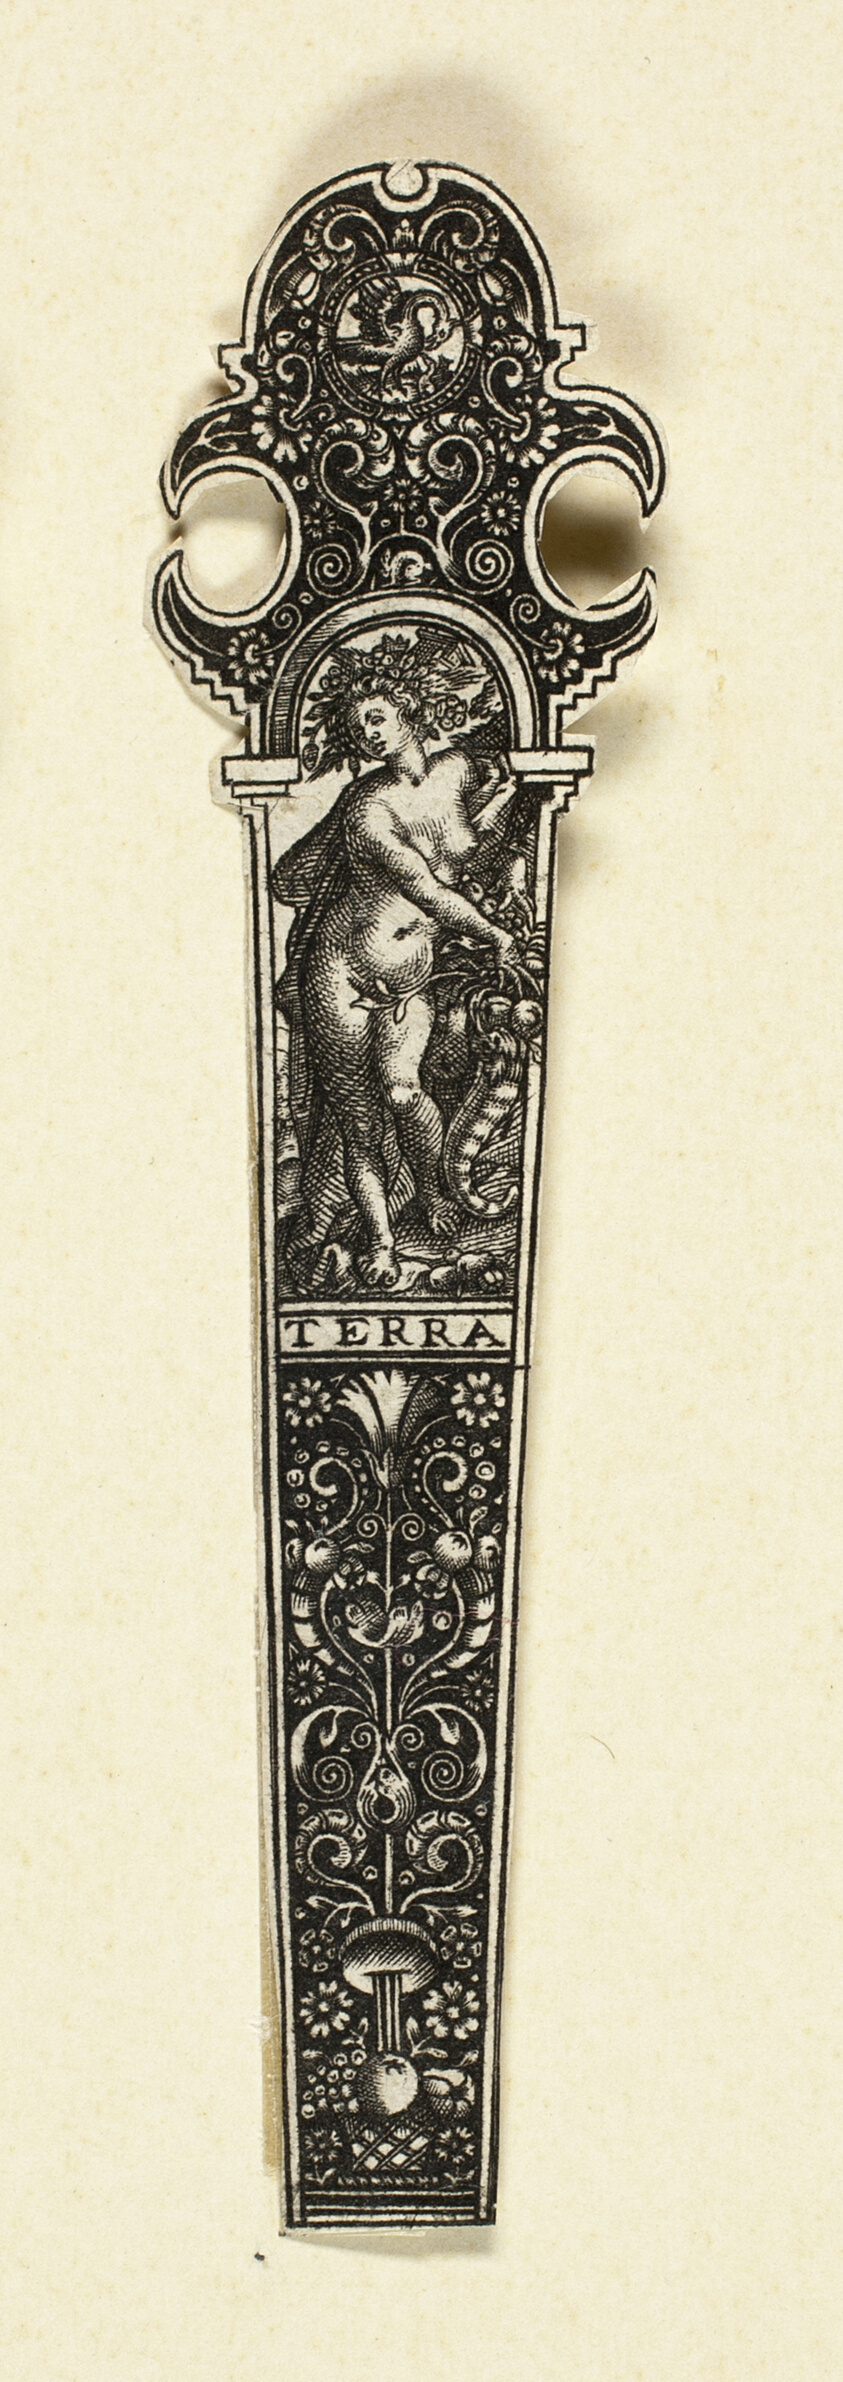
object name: Print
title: Ornamental Design for Knife Handle with Earth, from The Four Elements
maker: Johann Theodor de Bry (German, 1561-1623)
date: c. 1590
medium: Engraving in black on ivory laid paper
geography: Flanders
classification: engraving; paper; print; prints and drawing